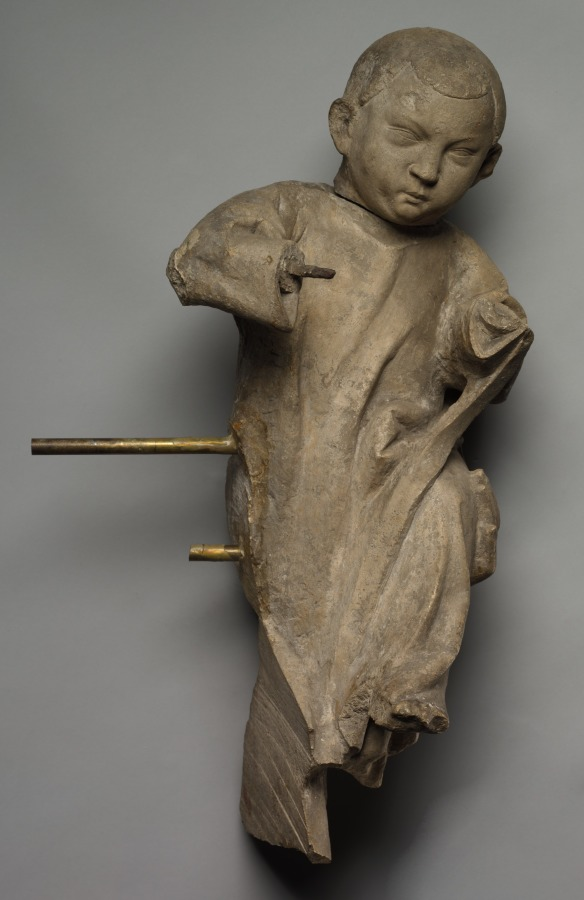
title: Figure of a Child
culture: France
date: 1300s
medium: stone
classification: Sculpture